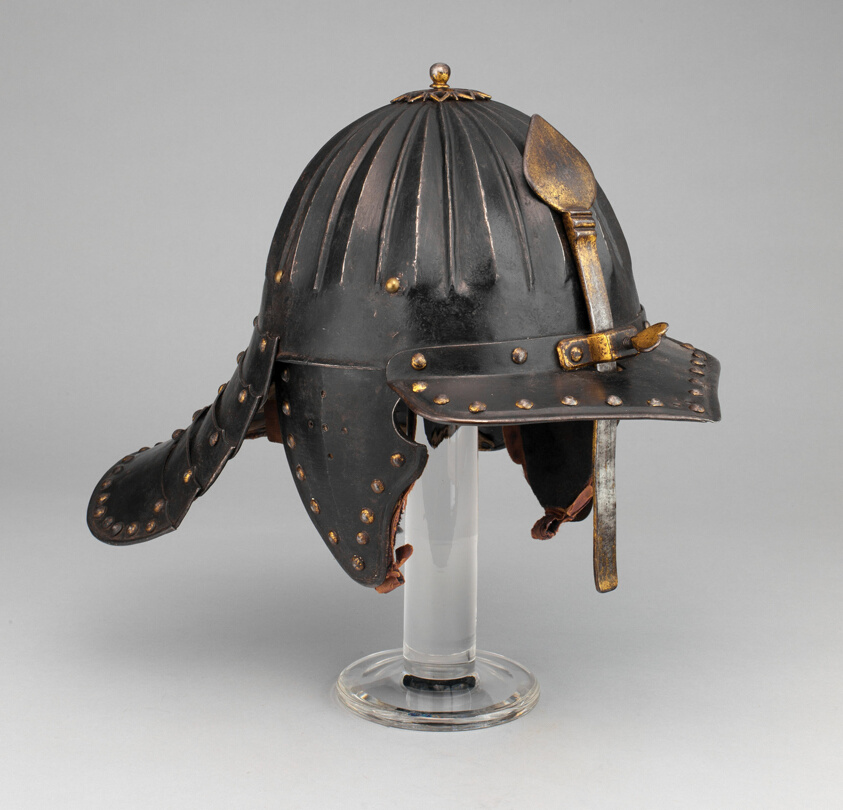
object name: Armor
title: Zischägge (Helmet)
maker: German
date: 1620-40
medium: Steel, brass, gilding, and textile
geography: Germany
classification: suit-helmet; armor; arms and armor